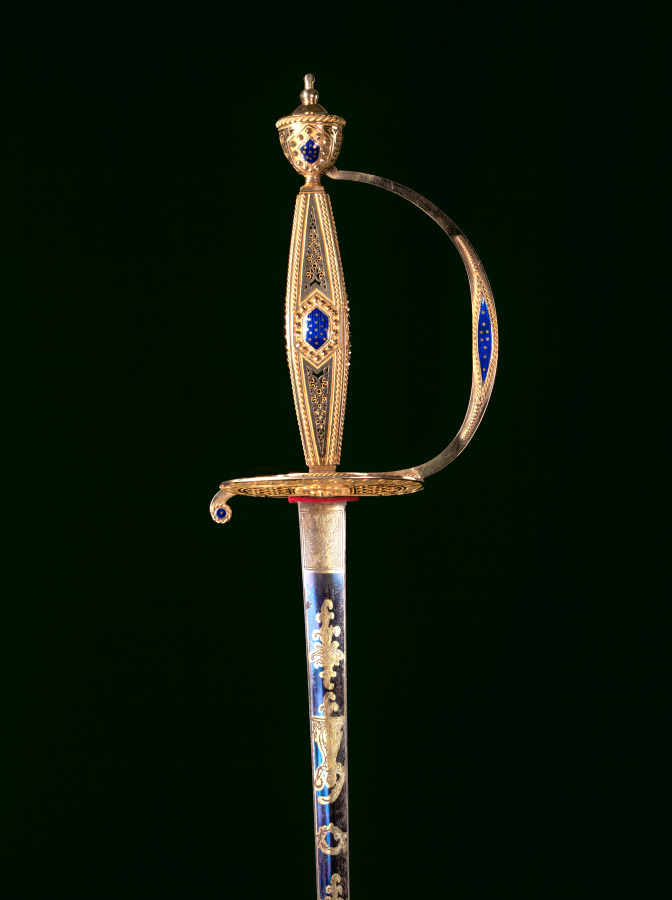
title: Small-Sword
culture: Switzerland, Geneva(?) (blade: Germany, Solingen, early 18th c.), late 18th Century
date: c. 1790–1800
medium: hilt: gold with blue translucent enamel; blade: etched, blued and gilded steel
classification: Arms and Armor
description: This example shows the small-sword at its latest and most refined stage of development. Though highly reflective of French taste, it was probably fashioned in a Swiss workshop under French influence or by a French craftsman working in Switzerland. Worn publicly as an emblem of social rank, this sword was likely custom-made for an affluent individual to use on formal or court occasions. So-called because of its short blade, the small-sword emerged as the light and quick weapon of choice for aristocratic civilians during the 1700s. Such a sword was traditionally suspended at about mid-thigh from the left side of a belt, the hilt exposed through the opening of the gentleman's coat. Highly visible, the hilt invited lavish decoration through precious materials such as gold and enamels, as seen here. Considered a type of masculine jewelry at that time, small-swords featured a variety of hilt styles that went in and out of fashion. Many were decorated to match personal costume, and jewelers worked on the finest small-swords of the day.